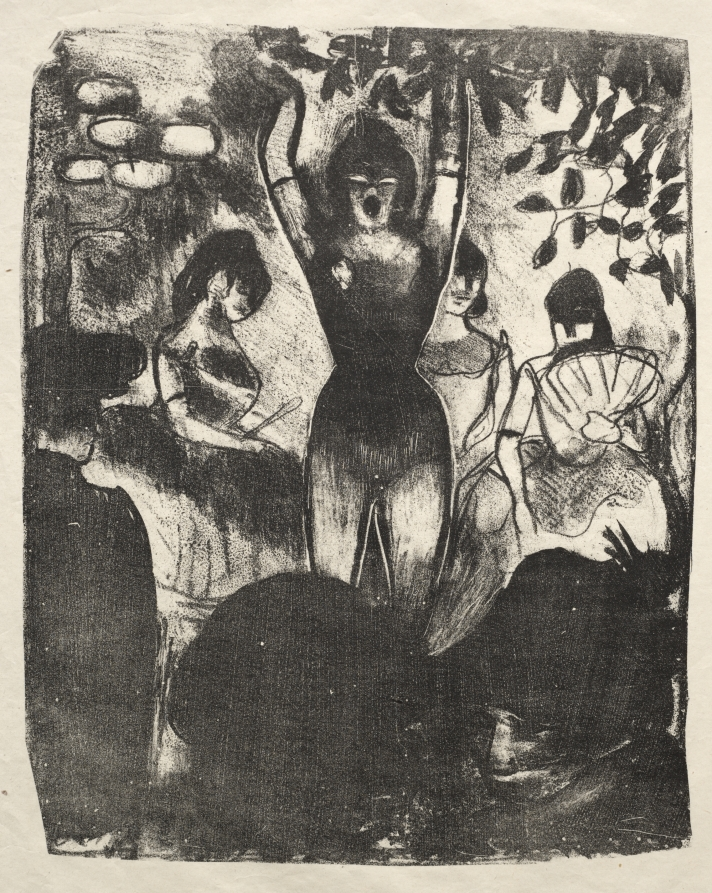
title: Singer at the Café-Concert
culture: France, 19th century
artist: Émile Bernard (French, 1868–1941)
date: 1888, printed 1896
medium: lithograph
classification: Print